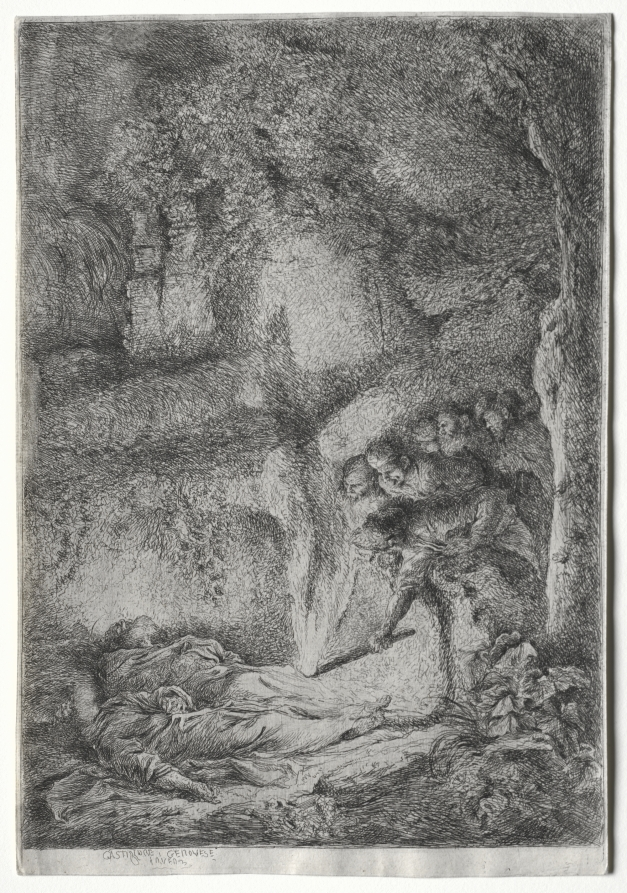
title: The Discovery of the Bodies of Saints Peter and Paul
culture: Italy, 17th century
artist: Giovanni Benedetto Castiglione (Italian, 1609–1664)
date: c. 1650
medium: etching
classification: Print